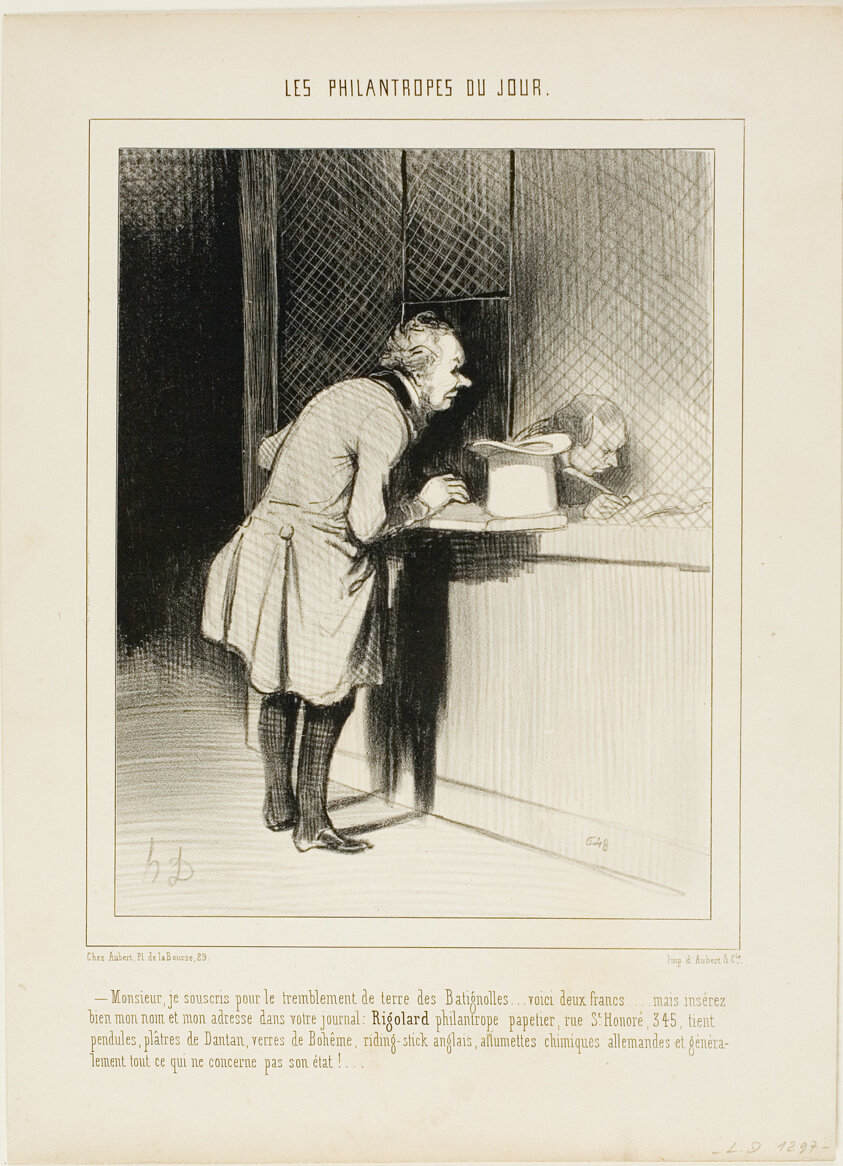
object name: Print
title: “- Sir, I would like to subscribe for the earth quake at Batignolles..... here are two Francs.... but put in properly my name and address in your newspaper, Rigolard - Philanthropist, stationer at rue St. Honoré 345, offering clocks and statues by Dantan, Bohemian glass, English riding sticks, German chemical matches and generally everything that does not really concern this matter,” plate 6 from Les Philantropes Du Jour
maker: Honoré Victorin Daumier; French, 1808-1879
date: 1844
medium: Lithograph in black on ivory wove paper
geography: France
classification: lithograph; print; prints and drawing